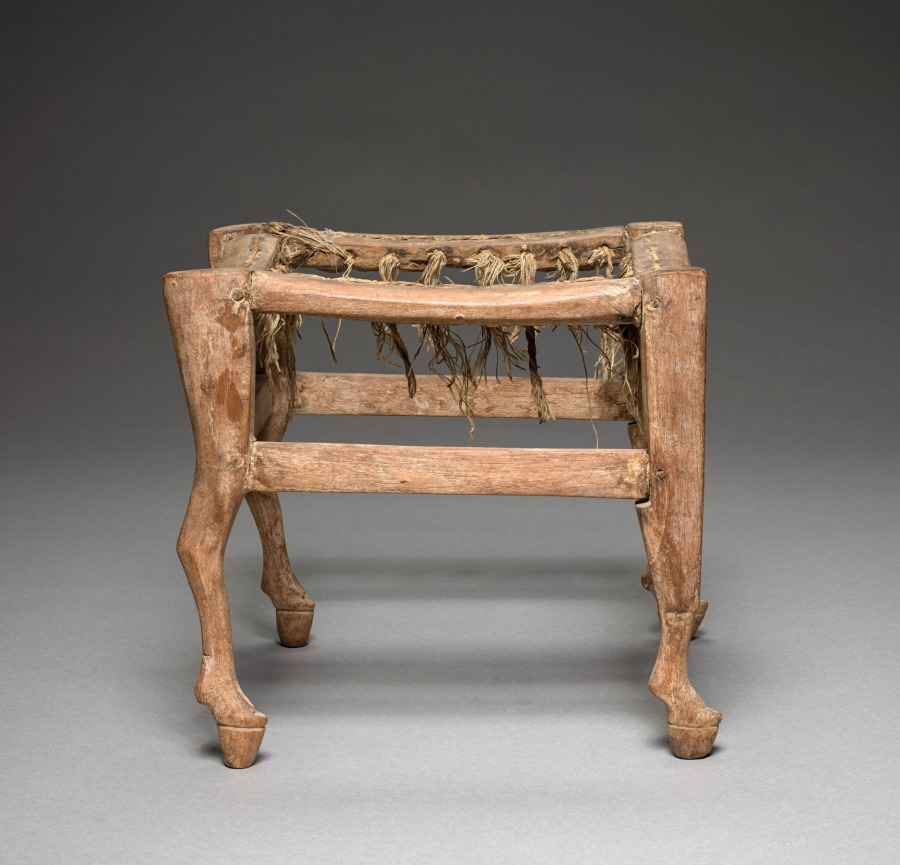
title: Child's Stool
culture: Egypt, New Kingdom (1540–1069 BCE), Dynasty 19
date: 1295–1188 BCE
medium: wood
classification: Funerary Equipment